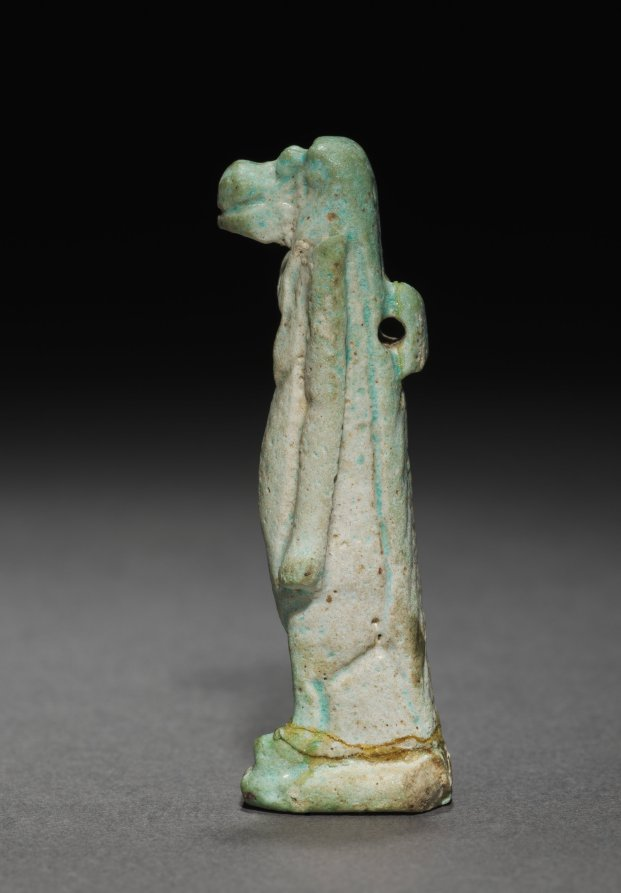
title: Amulet of Taweret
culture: Egypt, Greco-Roman period (332 BCE–395 CE), Ptolemaic dynasty (305–30 BCE)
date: 305–30 BCE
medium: light robin's egg blue faience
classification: Amulets